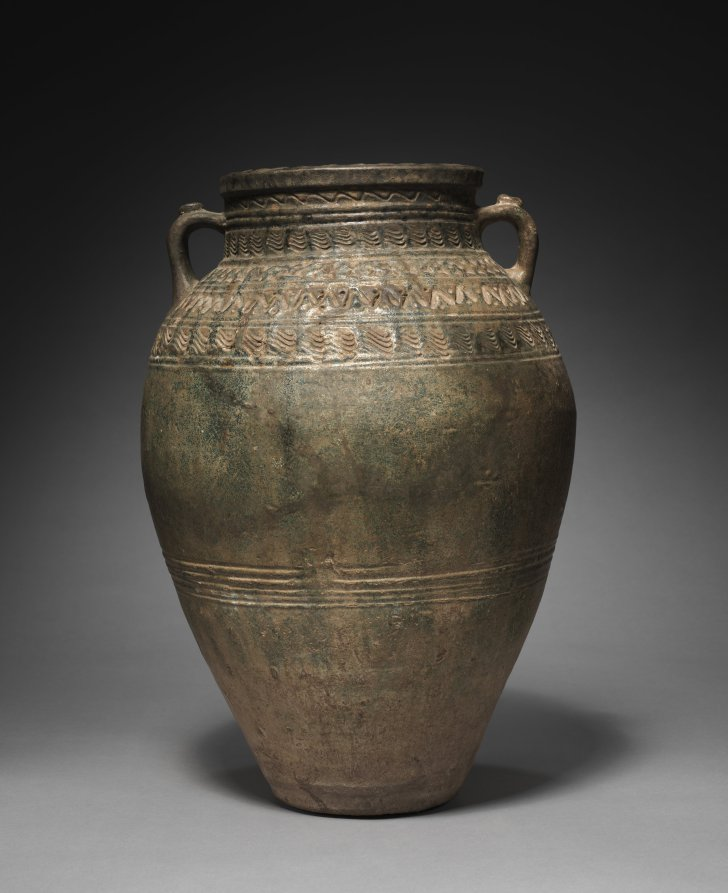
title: Jar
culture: Iran, Sasanian Empire (224–651 CE)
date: 222–650 CE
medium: earthenware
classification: Ceramic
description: Simply decorated with bands of wavy and dotted sawtooth patterns on the neck and shoulder, this large jar features two small handles for lifting and a wide mouth for easy access to its contents. A shiny glaze covers the exterior surface.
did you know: This large vessel was thrown in three or four sections.